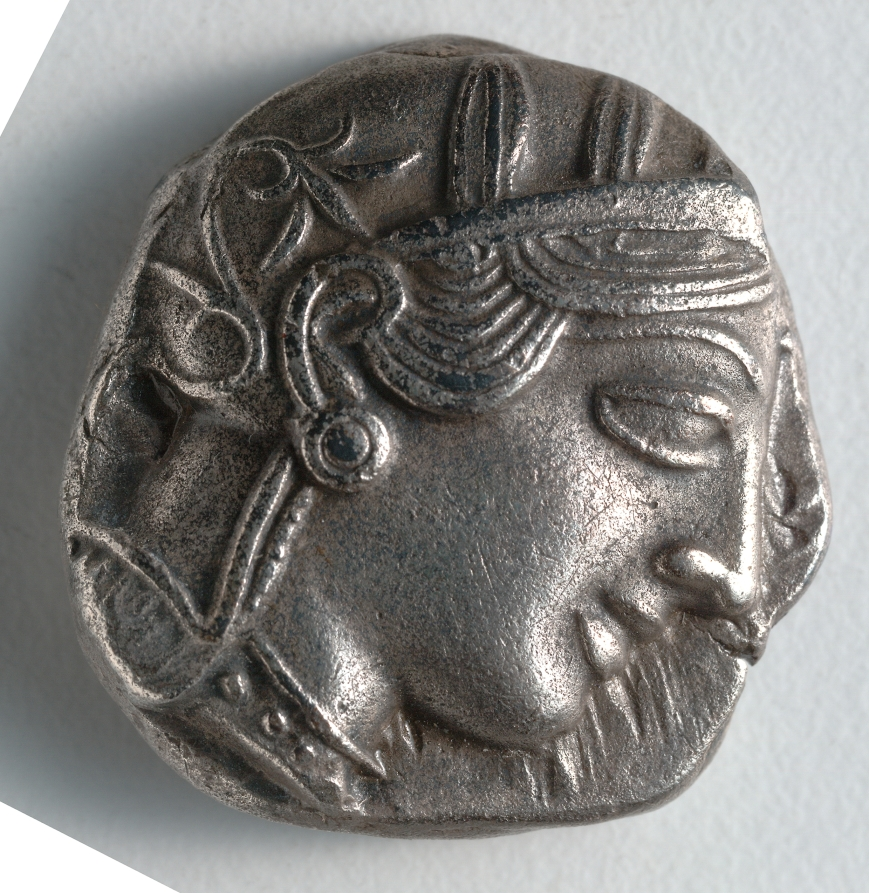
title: Tetradrachm: Head of Athena, r. (obverse)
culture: Greek, minted at Athens (Attica)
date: 449–440 BCE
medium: silver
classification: Coins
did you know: The images of Athena here and her owl on the reverse, unmistakably identify this coin as Athenian.